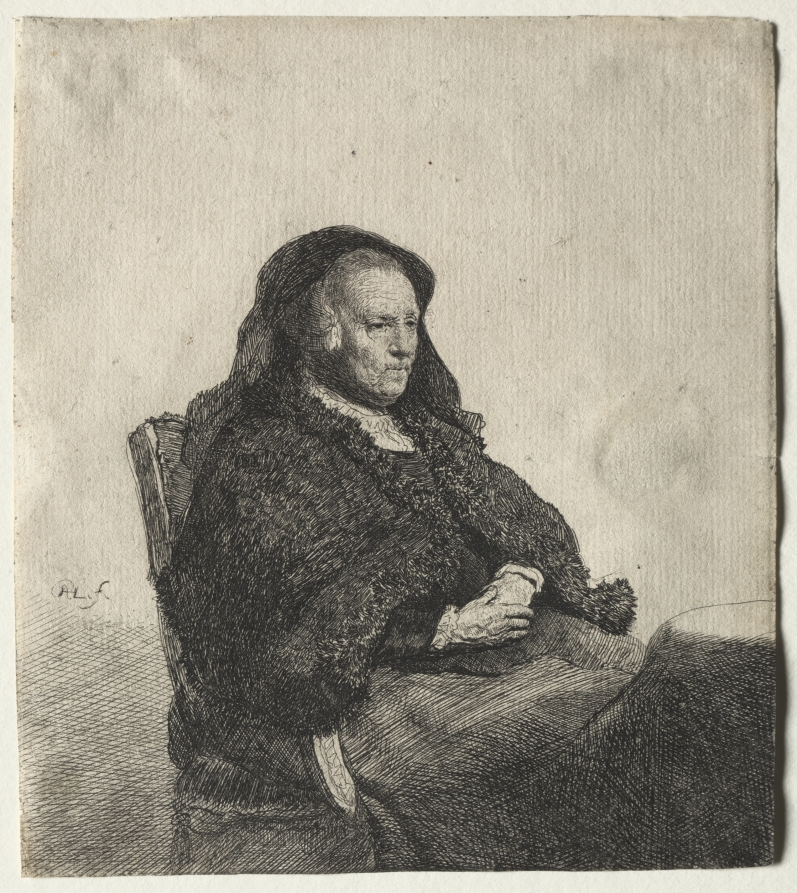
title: The Artist's Mother Seated at a Table, Looking Right: Three Quarter Length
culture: Netherlands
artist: Rembrandt van Rijn (Dutch, 1606–1669)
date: c. 1631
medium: etching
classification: Print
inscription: center left, in plate: RHL.[in monogram] f. ; VERSO, upper left, in pen and brown ink: [illegible] ; lower left, in graphite:B. 343. ; lower left, in graphite: 1520/6 ; lower center, in graphite: I / C[reversed] C ; lower right, in graphite: Owen[?]